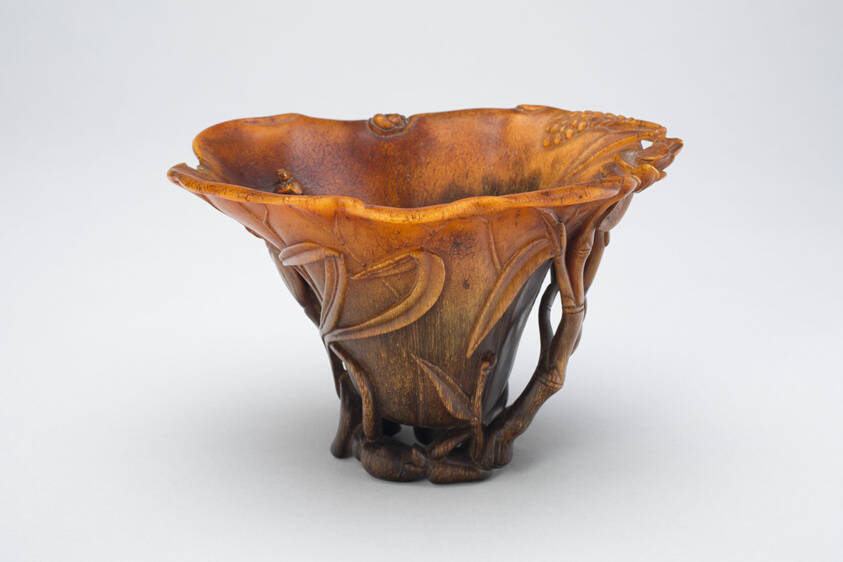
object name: Vessel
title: Cup in the Form of an Open Lotus Leaf, with Water Weeds and Grasses Amongst Lotus Buds and Stalks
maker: China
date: Late Ming (1368–1644) or early Qing dynasty (1644–1911), 17th/18th century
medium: Rhinoceros horn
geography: China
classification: drinking vessel; rhinocerous horn; horn; vessel; asian art